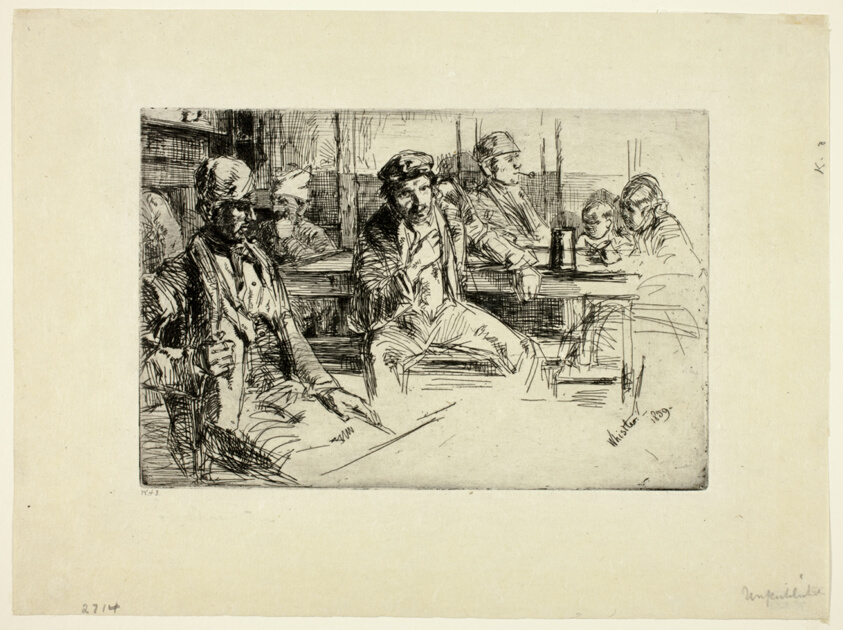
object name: Print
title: Longshore Men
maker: James McNeill Whistler (American, 1834-1903)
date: 1859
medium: Etching and drypoint in black on cream Japanese paper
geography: United States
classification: etching; print; prints and drawing; paper; drypoint